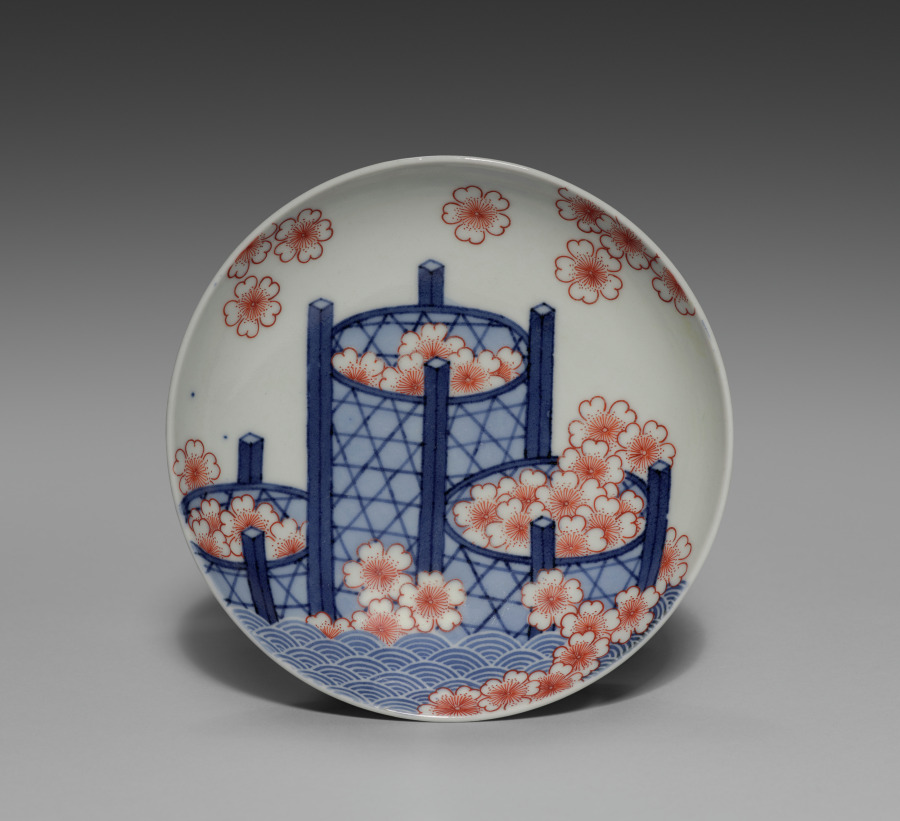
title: Small Dish (Kozara) with Cherry Blossoms in Baskets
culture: Japan, Edo period (1615–1868)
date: c. 1670‒1710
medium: Porcelain with underglaze blue and overglaze color enamel (Hizen ware, Nabeshima type)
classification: Ceramic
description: The cherry blossoms and stylized wave pattern that appear on this dish remain popular today.